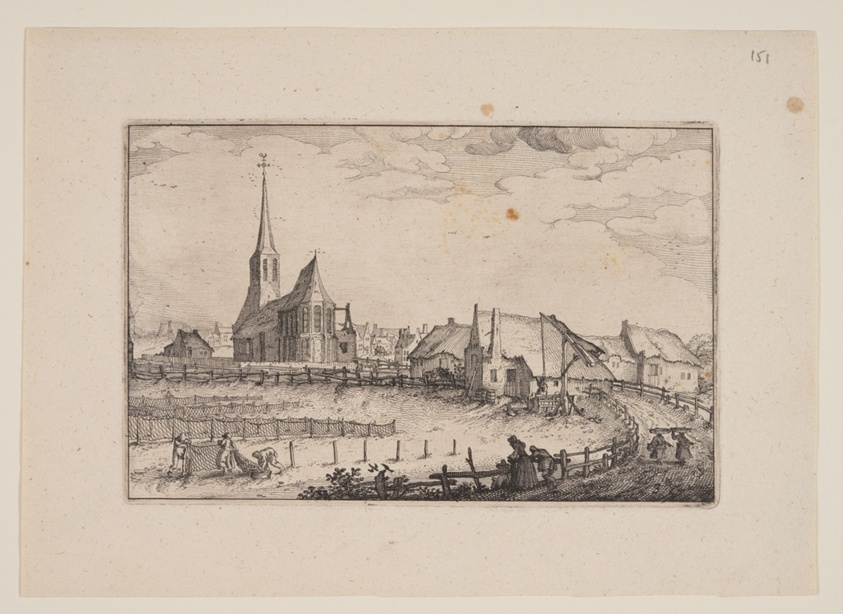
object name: Print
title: The Village Zandvoort, from Views in the Surroundings of Haarlem (Plaisante Plaetsen)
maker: Claes Jansz. Visscher (Netherlandish, c. 1550–c. 1612)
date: 1610/20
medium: Etching on ivory laid paper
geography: Netherlands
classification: print; paper; prints and drawing; etching